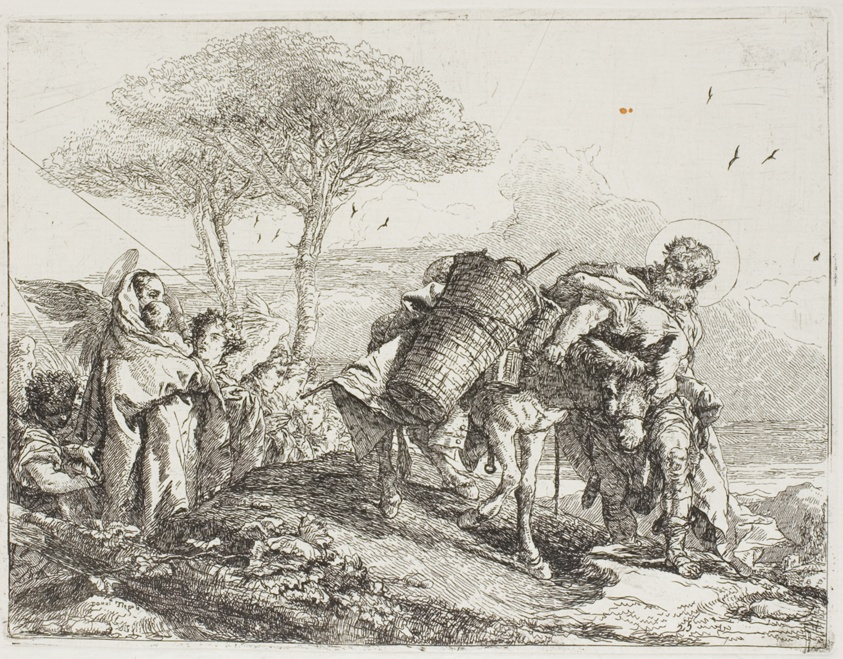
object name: Print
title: Mary, Helped by Two Angels, Follows Joseph with the Donkey, plate 25 from The Flight into Egypt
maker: Giovanni Domenico Tiepolo (Italian, 1727-1804)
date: 1753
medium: Etching on paper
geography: Italy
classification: etching; print; prints and drawing